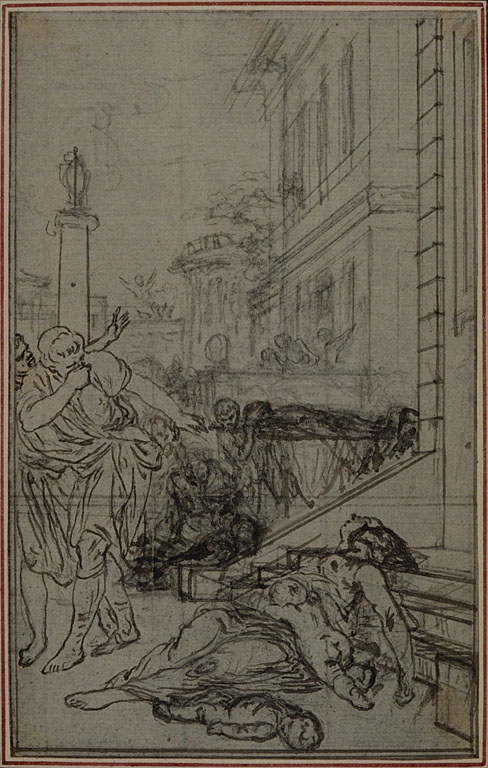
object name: Drawing and Watercolor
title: Study for the Vignette of Lucretius's "De la Nature des Choses", Vol. II, Book VI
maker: Hubert François Gravelot (French, 1699-1773)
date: c. 1768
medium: Pen and black ink, with graphite and traces of black chalk, on gray laid paper, incised for transfer and perimeter mounted on cream laid paper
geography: France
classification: pen and ink drawings; drawings (visual works); prints and drawing